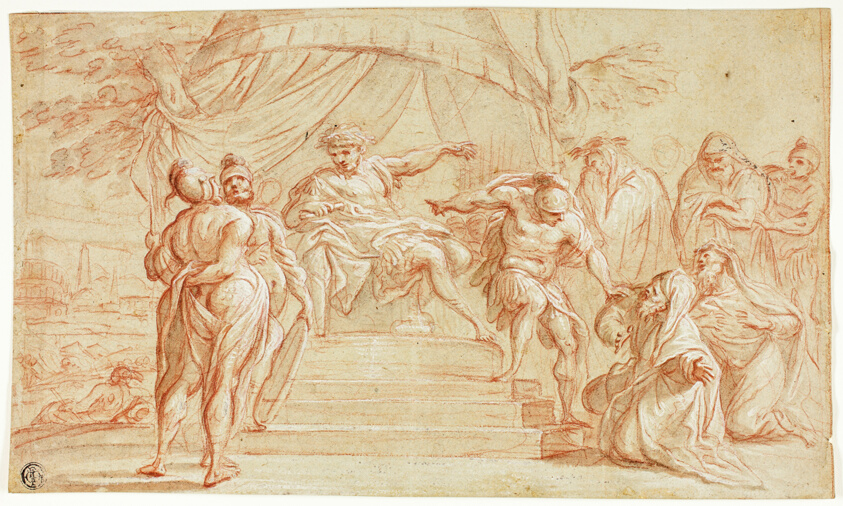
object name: Drawing and Watercolor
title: Scene From Roman History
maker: Thomas Blanchet (French, 1614/17-1689)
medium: Red chalk, with brush and gray-brown and red chalk wash, with touches of black chalk, heightened with lead white (partially discolored), on tan laid paper with blue fibers, laid down on cream laid paper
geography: France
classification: chalk; drawings (visual works); prints and drawing